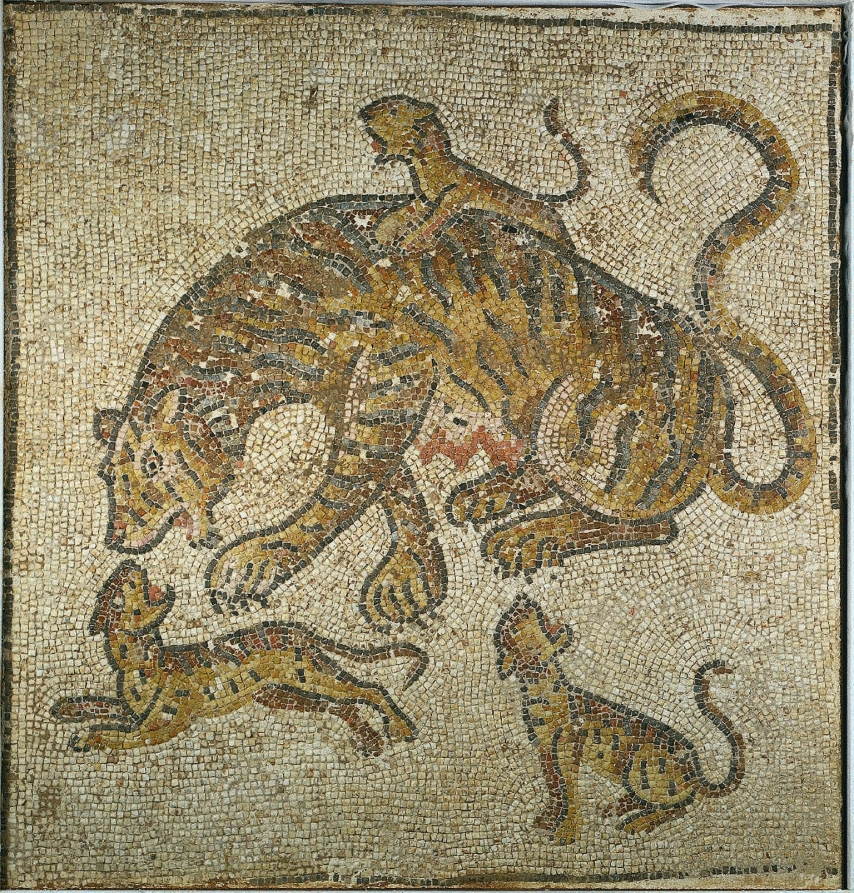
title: Mosaic of Tigress and Cubs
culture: Eastern Roman Empire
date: 300s CE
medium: tesserae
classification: Mosaic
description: Despite its rectangular shape and creation from mostly square tesserae, this mosaic incorporates many curves in its composition, particularly for the tails of the tigers. With one cub on her back and two before her, the mother tiger reaches out with one paw and an open mouth, whether to scold or to play. Unlike lions, leopards, and bears, tigers appear relatively rarely in Roman art, with the tigress seen more frequently than her male counterpart.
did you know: This mosaic includes over ten thousand tesserae, or small cut-stone tiles.